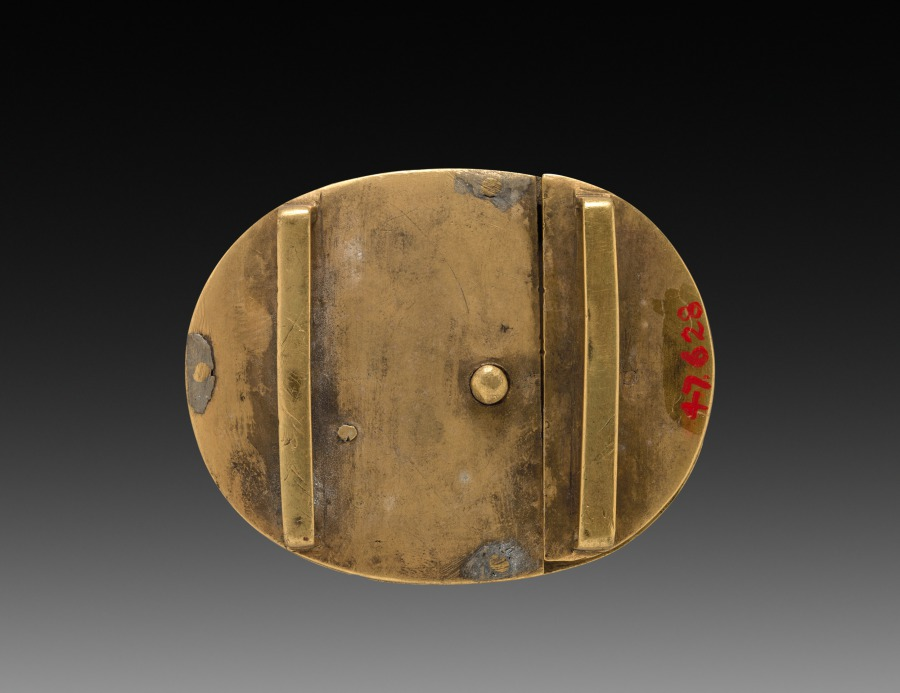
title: Buckle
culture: China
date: 1900s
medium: brass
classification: Jewelry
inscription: 日, 月